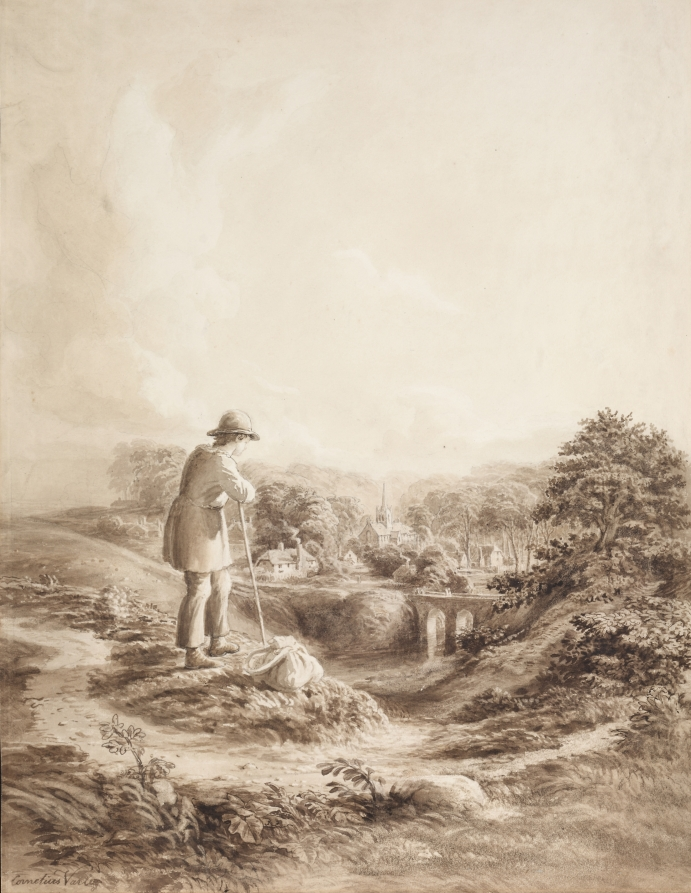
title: Landscape with Figure in Foreground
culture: England, 19th century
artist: Cornelius Varley (British, 1781–1873)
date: c. 1840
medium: brown ink and brown wash with graphite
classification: Drawing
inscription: signed in ink: Cornelius Varley; notes on verso in graphite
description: Primarily self-taught, Varley played a significant role in the development of open-air drawing practice in 19thcentury England. He relished the opportunity to engage directly with natural phenomena and made numerous sketches of the English landscape. Raised by his uncle who was a watchmaker, Varley combined his artistic interests with his exposure to science, and in 1809 invented a "graphic telescope," a drawing instrument loosely derived from the camera obscura. Varley’s drawings were more than mere transcriptions of nature, however. This drawing illustrates a stanza of Samuel Roger’s popular poem "The Pleasures of Memory": The adventuring boy that asks his little share And hies from home, with many a gossip’s prayer Turns on a neighboring hill once more to see The dear abode of peace and privacy; And as he turns, the thatch among the trees The smoke’s blue wreaths, ascending from the breeze, The Village Common scattered with white sheep All rouse reflection’s sadly pleasing train And oft he looks, and weeps, and looks again.